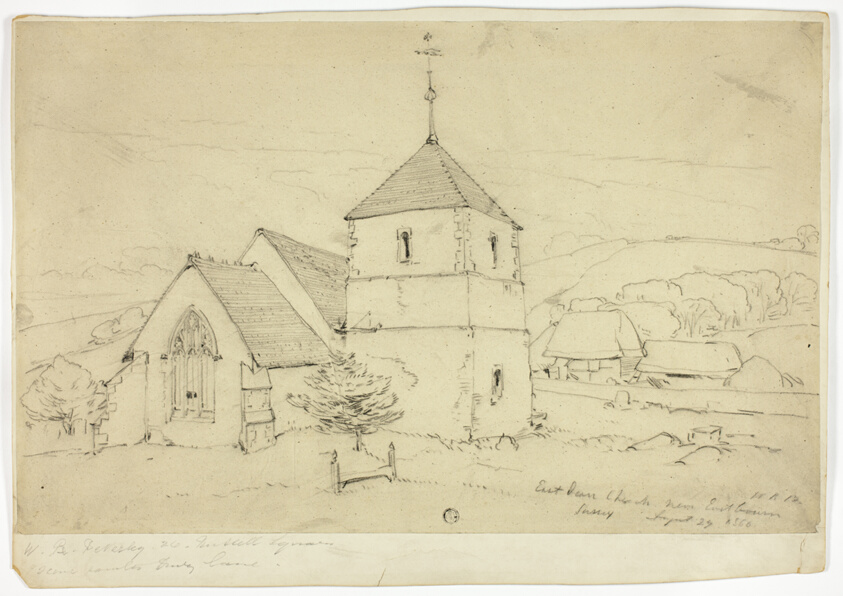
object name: Drawing and Watercolor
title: Eastdam Church near Eastbourn Sussex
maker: William Roxby Beverley (English, c. 1811-1889)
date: Aug. 27, 1866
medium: Graphite and charcoal on cream laid paper, laid down on off-white board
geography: England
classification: graphite; paper; charcoal; drawings (visual works); prints and drawing